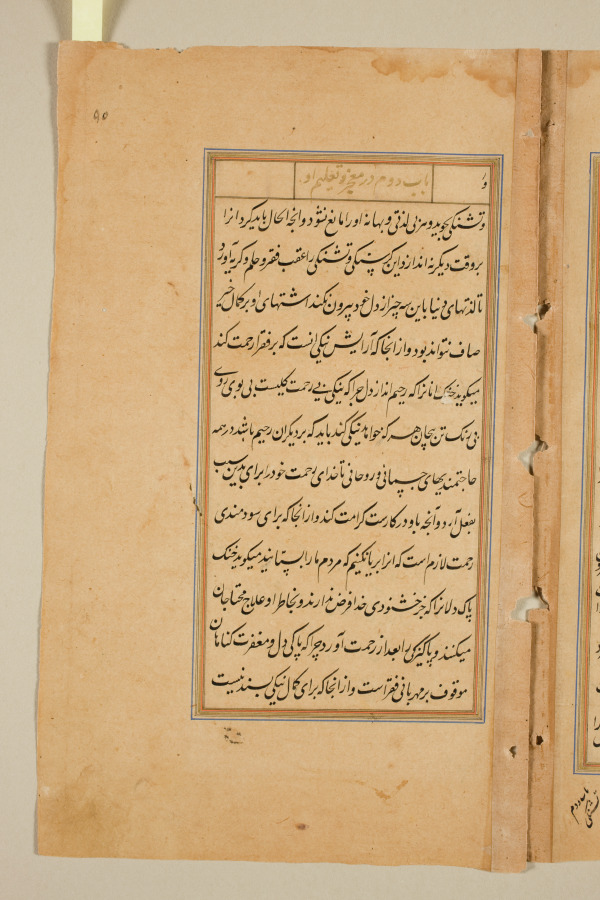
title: Text page from a Mirror of Holiness (Mir’at al-quds) of Father Jerome Xavier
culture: Mughal India, Allahabad, made for Prince Salim (1569–1627)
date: 1602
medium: Ink and gold on paper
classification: Manuscript